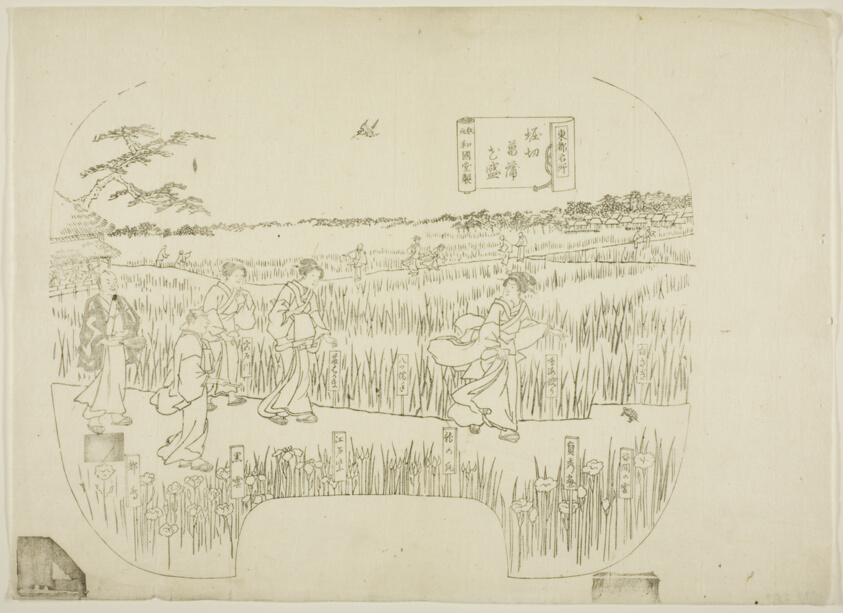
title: Key block for a print from the series "Toto meisho" (Famous Views of the Eastern Capital)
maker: Utagawa Sadahide (Japanese, 1807-1873)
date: undated (c. 1850s)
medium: Color woodblock print, ôban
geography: Japan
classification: woodblock print; print; asian art